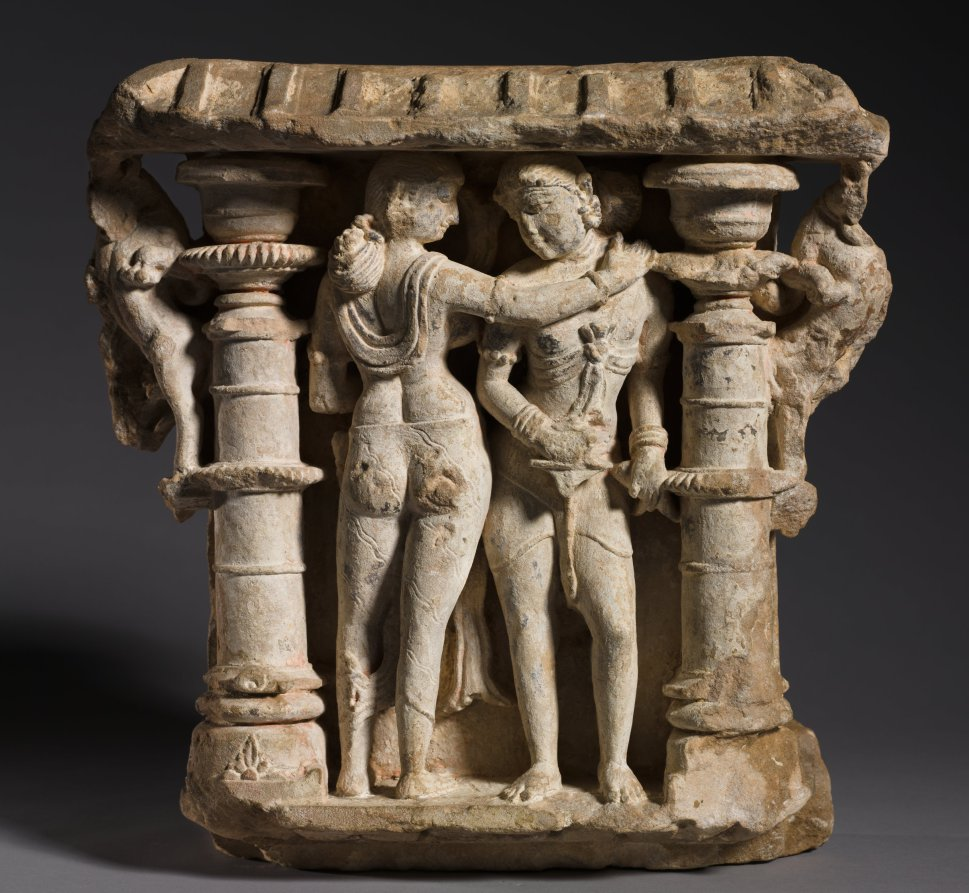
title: Lovers (Mithuna)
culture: Northwestern India, Rajasthan, Sikar, Harshagiri, Pratihara Dynasty, 10th Century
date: c. 973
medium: sandstonewith limestone wash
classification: Sculpture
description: Along with the adjacent architectural frieze with dancer and musicians, this tender scene was built into the exterior wall of the now ruined Purana Mahadeva Temple, dedicated to the Hindu god Shiva. Erotic imagery depicting couples interacting with each other in various postures were important components on the exterior of Hindu temples. They underscore the infinite beauty and abundance of the created world.